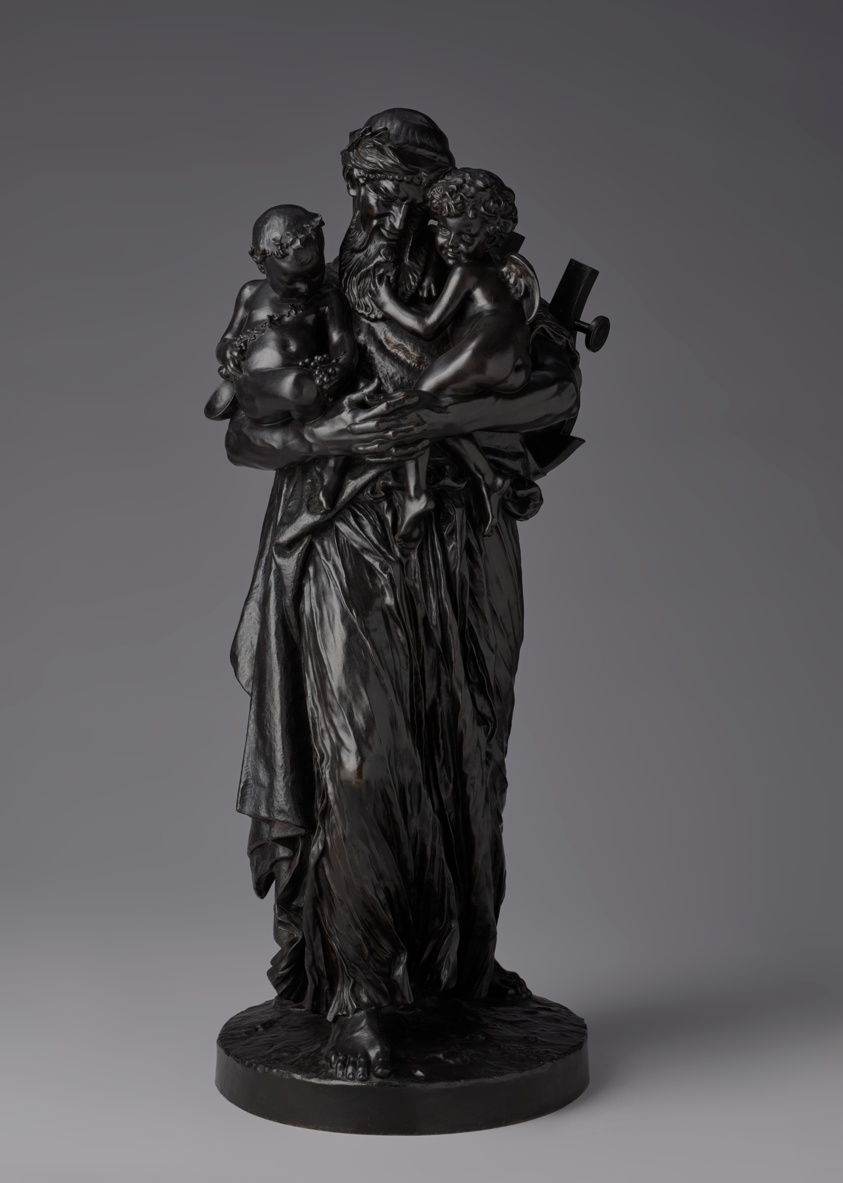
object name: Sculpture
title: Anacreon with the Infants Bacchus and Cupid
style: nineteenth century, 19th century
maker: Jean Léon Gérôme (French, 1824–1904)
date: Modeled 1878, cast c. 1893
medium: Bronze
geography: France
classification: statuette; sculpture; french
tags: mythological figures, men, children, gods (deities), mythology, cupids, man, babies, Greek gods, mythical